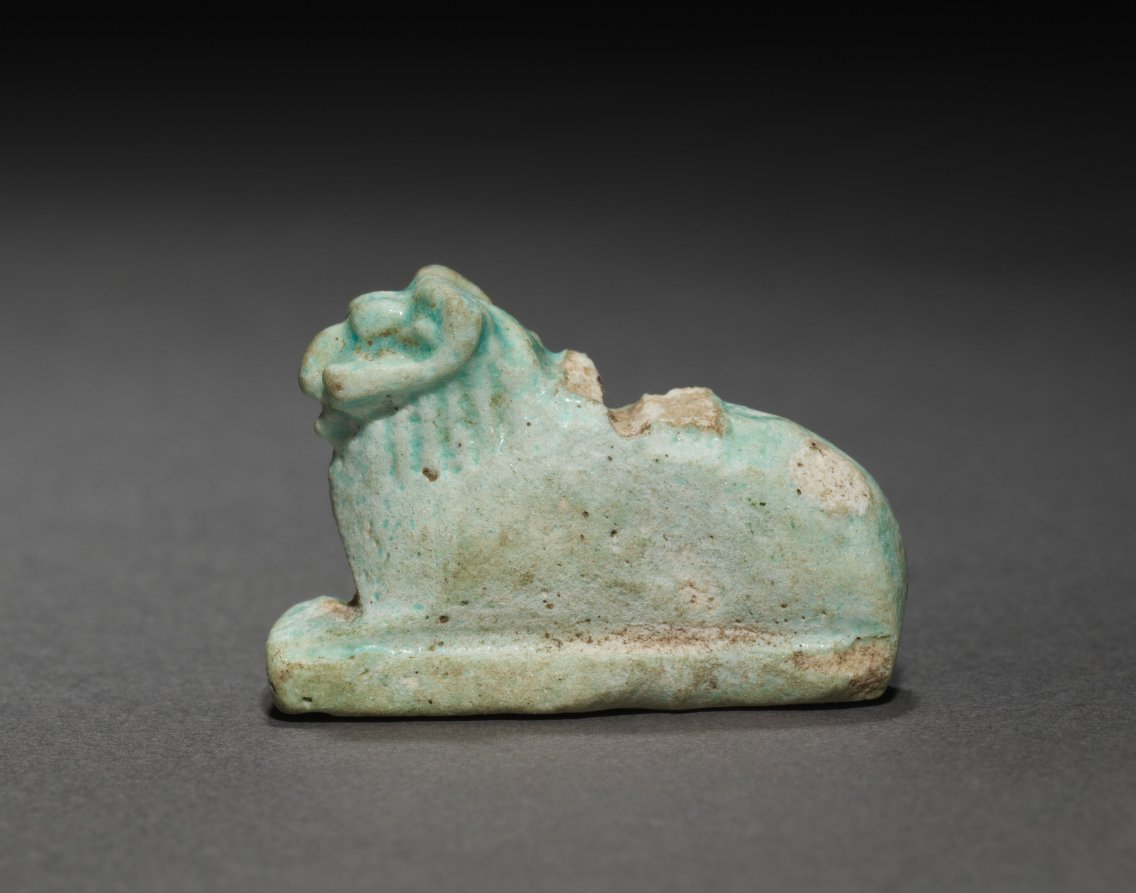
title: Ram Amulet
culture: Egypt, Greco-Roman period (332 BCE–395 CE), Ptolemaic dynasty (305–30 BCE)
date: 305–30 BCE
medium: light robin's egg blue faience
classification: Amulets